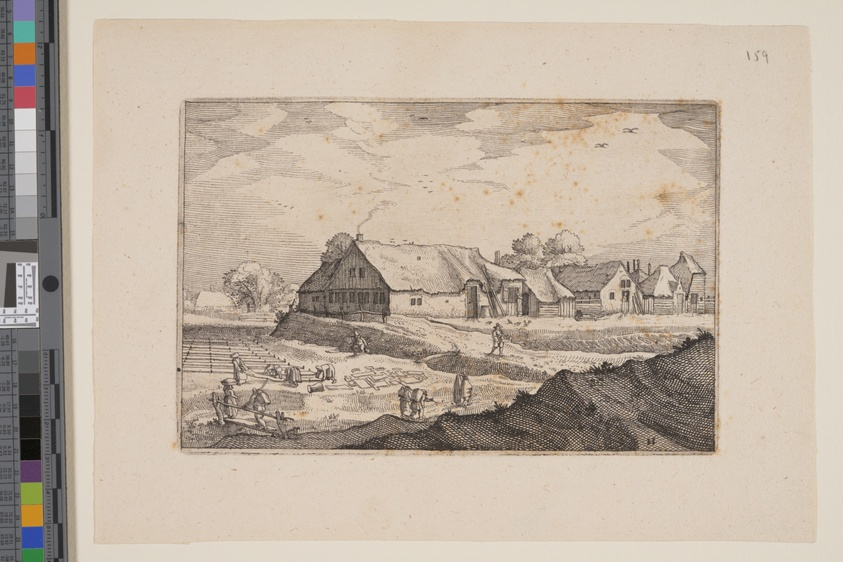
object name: Print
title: Farms and Bleaching-Fields, from Views in the Surroundings of Haarlem (Plaisante Plaetsen)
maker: Claes Jansz. Visscher (Netherlandish, c. 1550–c. 1612)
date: 1610/20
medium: Etching on ivory laid paper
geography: Netherlands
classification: print; paper; prints and drawing; etching